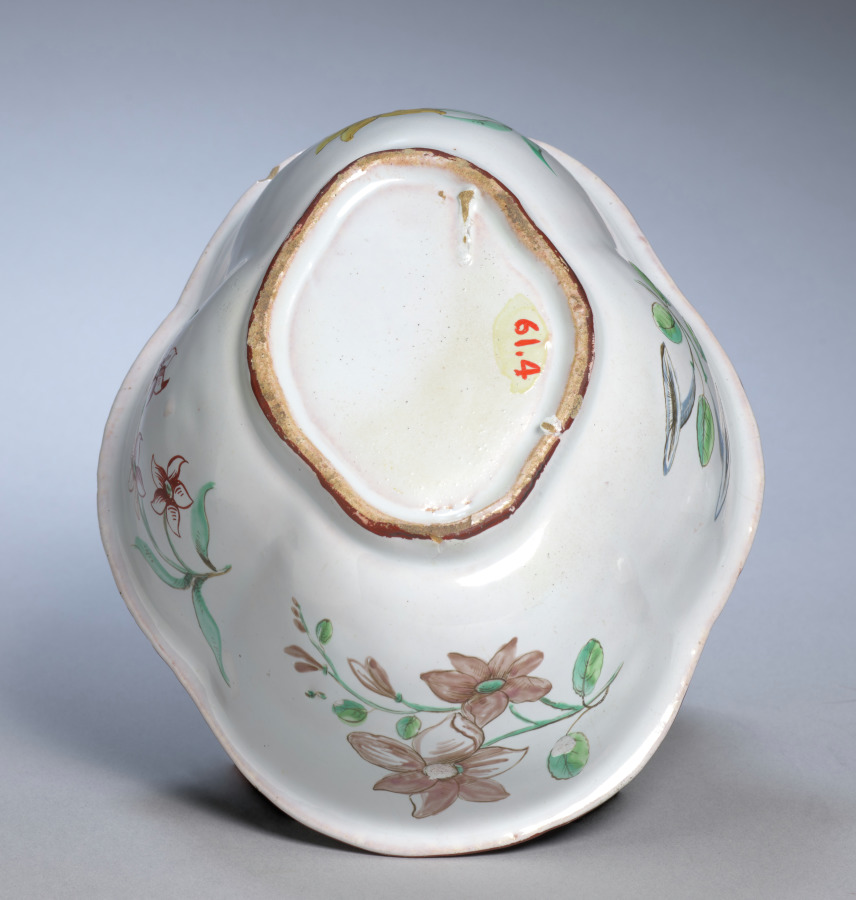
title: Sugar Basin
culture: France, 18th century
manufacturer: Sceaux Factory (French, active 1748–66)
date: c. 1750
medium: faience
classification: Ceramic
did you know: In medieval Italian churches, painted altarpieces served as a focal point for worshippers during the rituals of faith. The figures of Jesus, Mary, and eight saints are framed by a golden background that would have glistened in the flickering candlelight of the church.